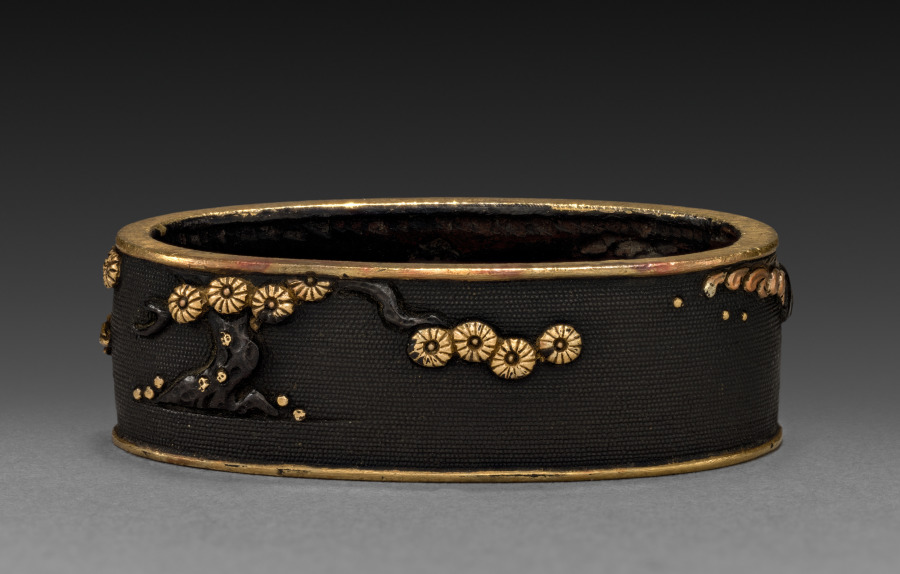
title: Sword-Hilt Collar (Fuchi)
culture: Japan, Edo period (1615–1868)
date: 1700–1850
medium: shakudo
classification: Arms and Armor